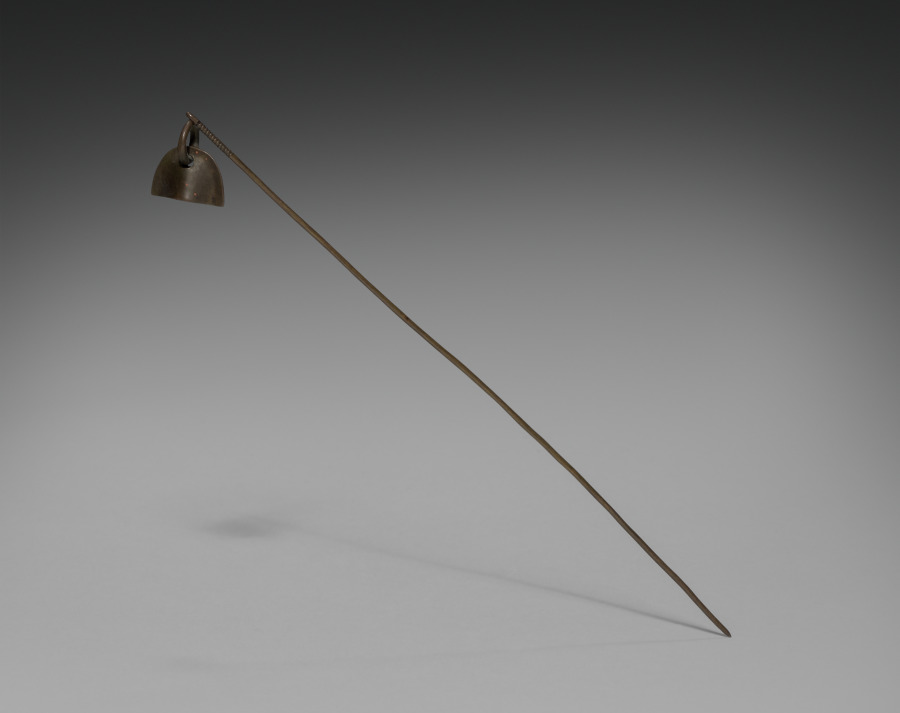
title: Pin (ndwong angwoong) for Hat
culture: Africa, Central Africa, Democratic Republic of the Congo, Kuba-style maker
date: early 1900s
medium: Metal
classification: Implements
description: Stick pins were practical, securing a hat to a man's hair. They were also a way to display social status. The material, attachments, number, or placement of metal stick pins were all significant. The miniature bell on this pin gives it the name ndwong angwoong. It was placed so that the bells dangled over the wearer's forehead.